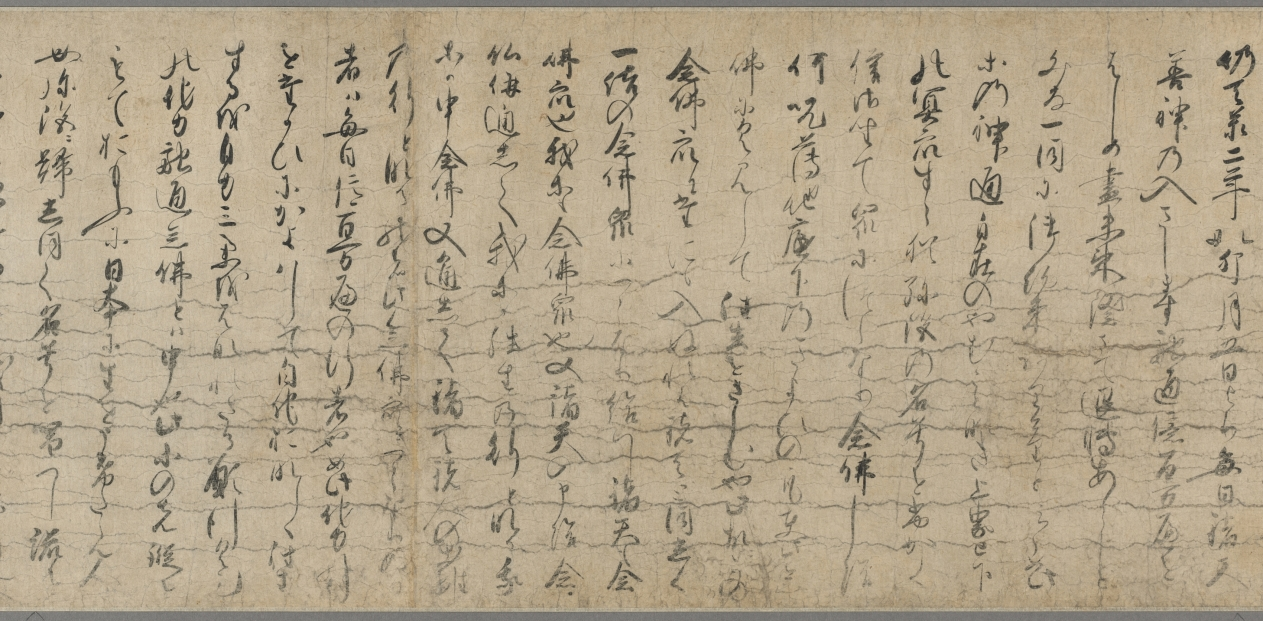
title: The Illustrated Miraculous Origins of the Yūzū Nenbutsu School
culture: Japan, Kamakura period (1185–1333)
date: early 1300s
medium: Handscroll; ink, color, and gold on paper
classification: Painting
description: This painting is the second of a set of two illustrated handscrolls. The first scroll depicts the biography of the Japanese Buddhist monk Ryōnin. This scroll begins with scenes of Ryōnin’s death and relates episodes illustrating the efficacy of following his teachings. Ryōnin asserted the total interconnectedness of all things and the spiritual benefit of chanting the name of the Buddha Amida for one another.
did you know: The other scroll from this two-scroll set belongs to the Art Institute of Chicago.